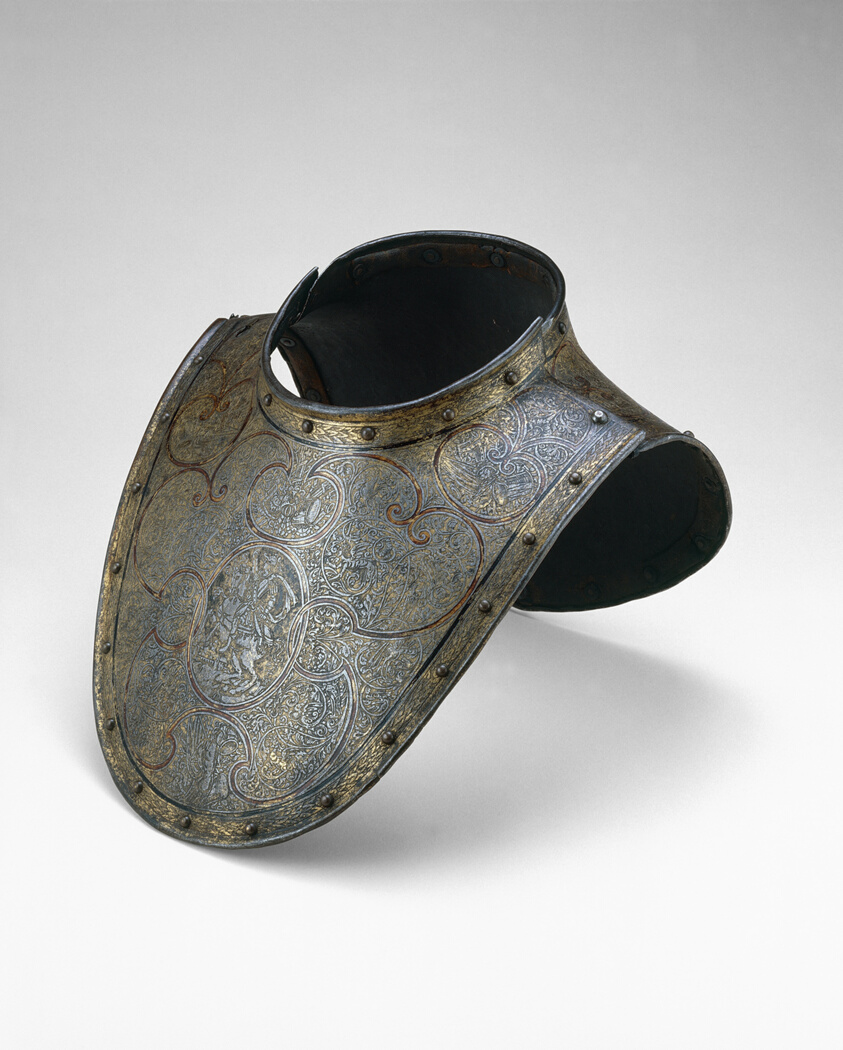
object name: Armor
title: Gorget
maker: French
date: 1590/1600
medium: Steel, gilding, brass, translucent enamel, and leather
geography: France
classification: arms and armor; suit-element; armor